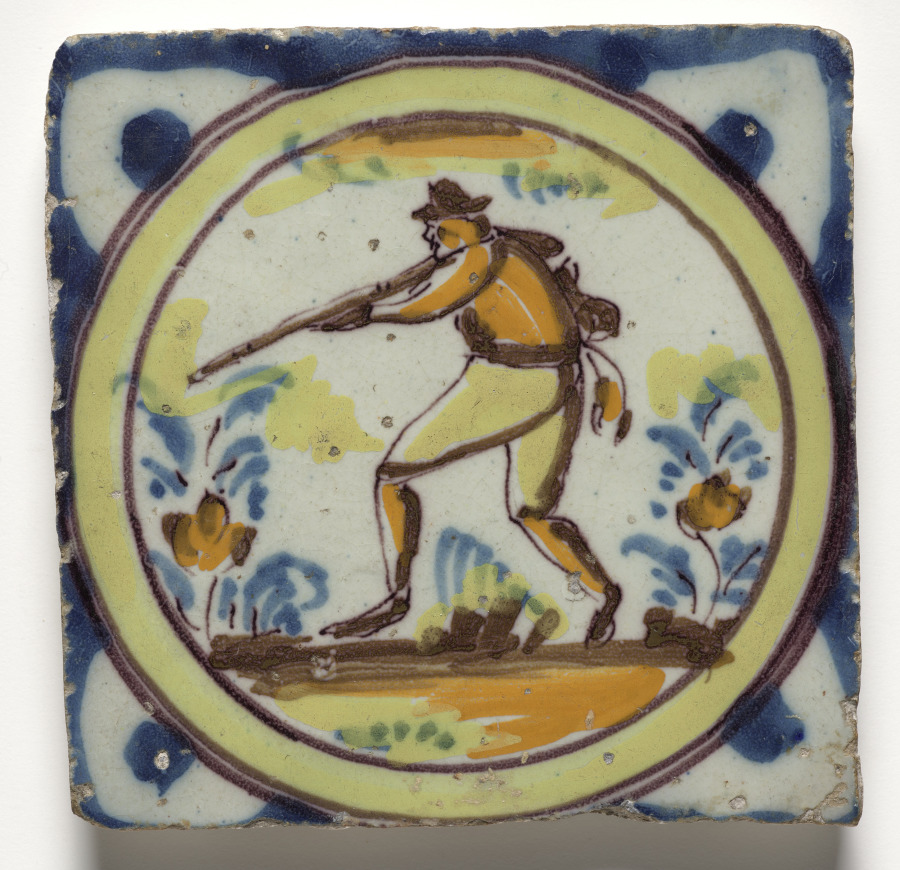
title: Wall Tile–Hunter with Rifle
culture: Spain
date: c. 1600s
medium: glazed ceramic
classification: Ceramic